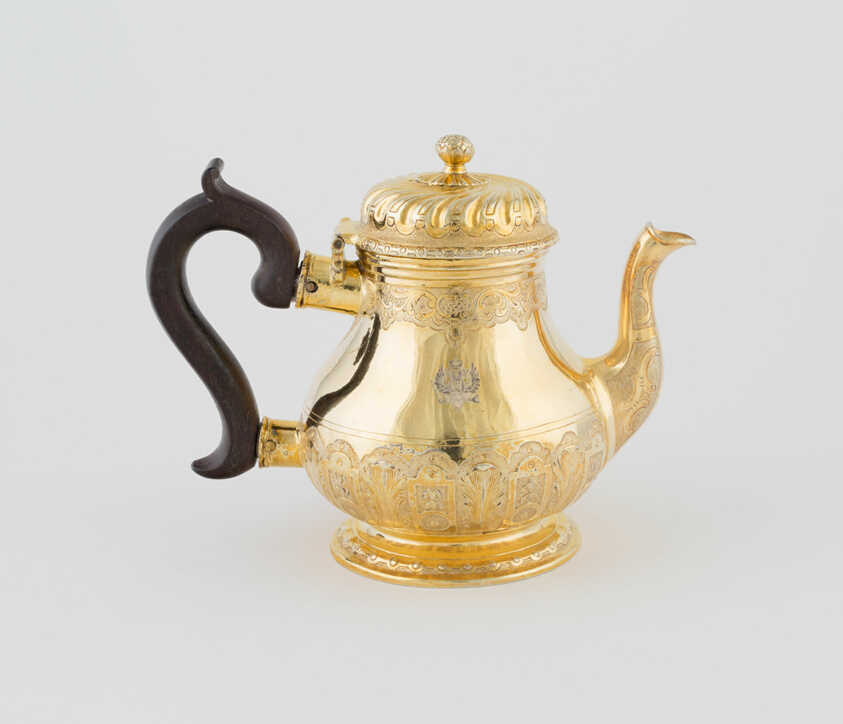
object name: Metalwork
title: Teapot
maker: Johann Köpping; Russian, d. 1783; Saint Petersburg, Russia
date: 1773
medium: Silver gilt and wood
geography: Saint Petersburg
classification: teapot; silver; metalwork; european decorative arts